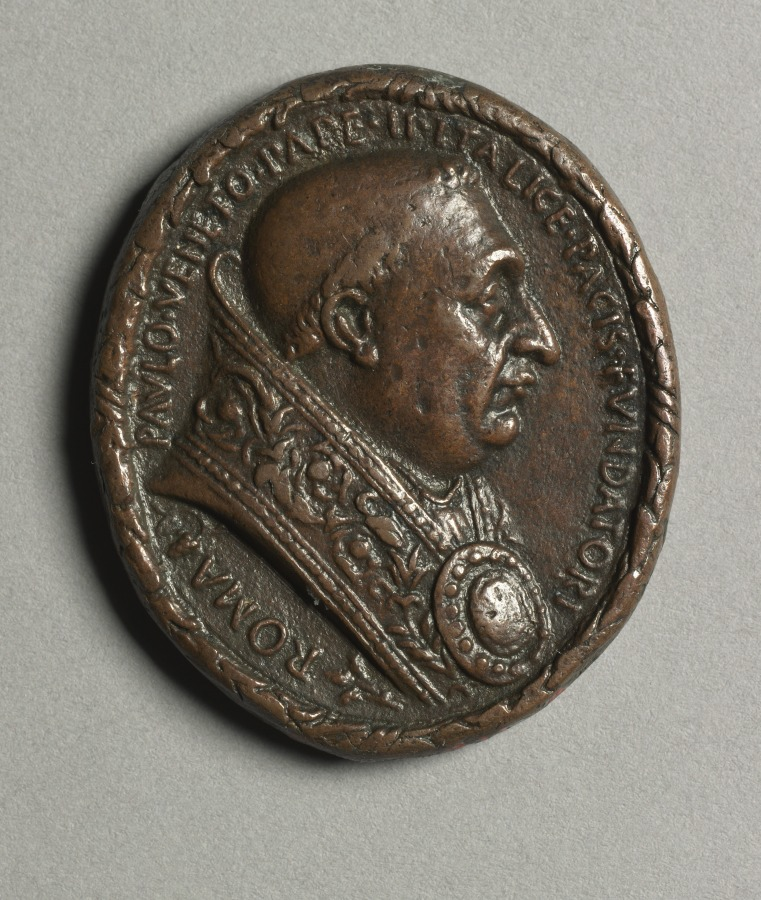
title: Portrait of Pope Paul II Barbo (obverse) and (reverse)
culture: Italy, 15th century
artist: Cristoforo di Geremia (Italian, active 1456–76)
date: c. 1468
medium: bronze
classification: Sculpture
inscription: obervse: PAVLO VENETO PAPE II ITALICE PACIS FVNDATORI ROMA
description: This medal is part of a series of four oval medals that celebrated Pope Paul II as the “Founder of Italian Peace.” Though his renewal of the Italian League in 1468, Paul aspired to maintain peace among the independent Italian states and evade foreign incursion. In previous years, infighting between Florence, Venice, Ferrara, Milan, Naples, and Bologna had left the peninsula vulnerable to Turkish invasion.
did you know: Rediscovered with fervor in fifteenth-century Italy, profiles on ancient coins provided dignified models for portrait medals of Renaissance elites.